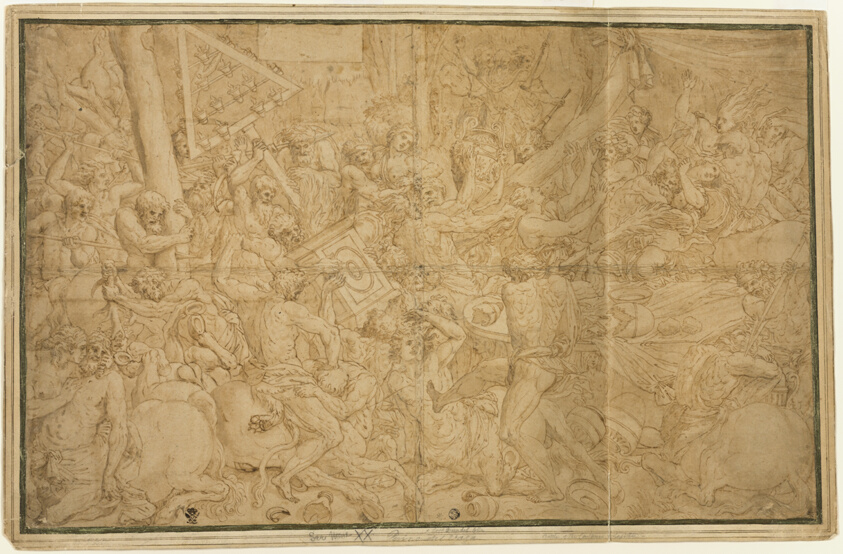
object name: Drawing and Watercolor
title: Battle of Lapiths and Centaurs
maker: Unknown Artist; Italian, late 16th Century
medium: Pen and brown ink with brush and brown wash, over black chalk, on tan laid paper laid down on cream laid paper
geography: Italy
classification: ink with wash; drawings (visual works); prints and drawing